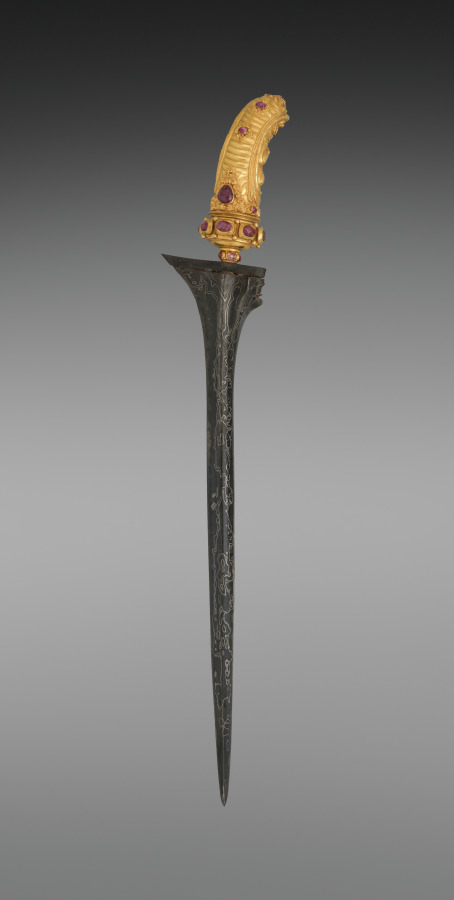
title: Kris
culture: Indonesia, Bali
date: 1800s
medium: metal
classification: Arms and Armor